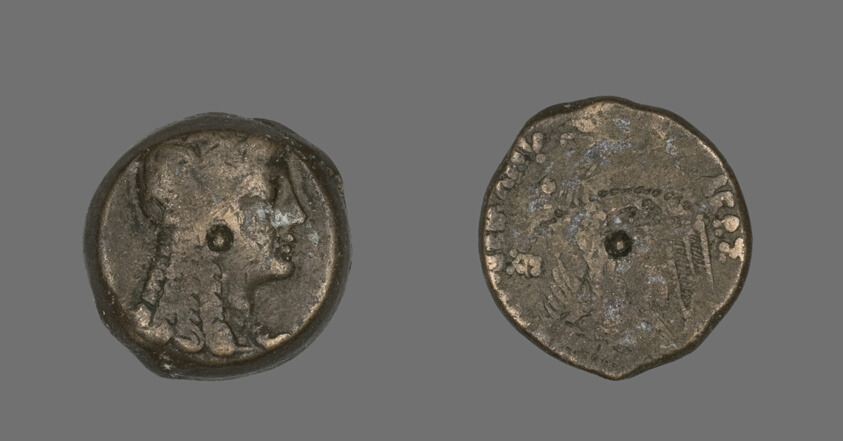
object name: Coin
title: Coin Portraying Queen Cleopatra I as the Goddess Isis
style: ptolemaic, greco-roman (egyptian)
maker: Greek; minted in Paphos, Cyprus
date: 146-127 BCE, issued by Ptolemy VIII Euergetes II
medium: Bronze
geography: Egypt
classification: coin; ancient art; struck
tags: cleopatra, goddesses